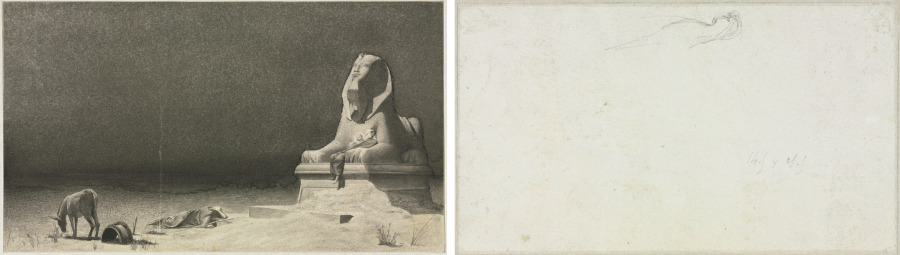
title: The Rest on the Flight into Egypt (recto); Sketch of a Sphinx [?] (verso)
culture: France, 19th century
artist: Luc-Olivier Merson (French, 1846–1920)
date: c. 1879–80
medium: gray and graphite wash, with scraping and traces of black chalk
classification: Drawing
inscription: verso: upper right, in graphite: [8?].86 x [8?].[7?]1 [sideways]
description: This drawing relates to Luc-Olivier Merson's Rest on the Flight into Egypt, among the most popular paintings exhibited at the 1879 Paris Salon. This dreamlike, highly unusual image from the familiar bible story shows Mary and Christ resting peacefully in the arms of a Sphinx, while Joseph sleeps near their dwindling fire. In the wake of its extraordinary success, Merson made several painted replicas of the work. Here, the composition is identical, but reversed, suggesting that it may have been an alternative version of the canvas.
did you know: It is possible that this drawing served as a model for a print, but the best-known printed reproduction of the painting differs from the sheet in several minor details.